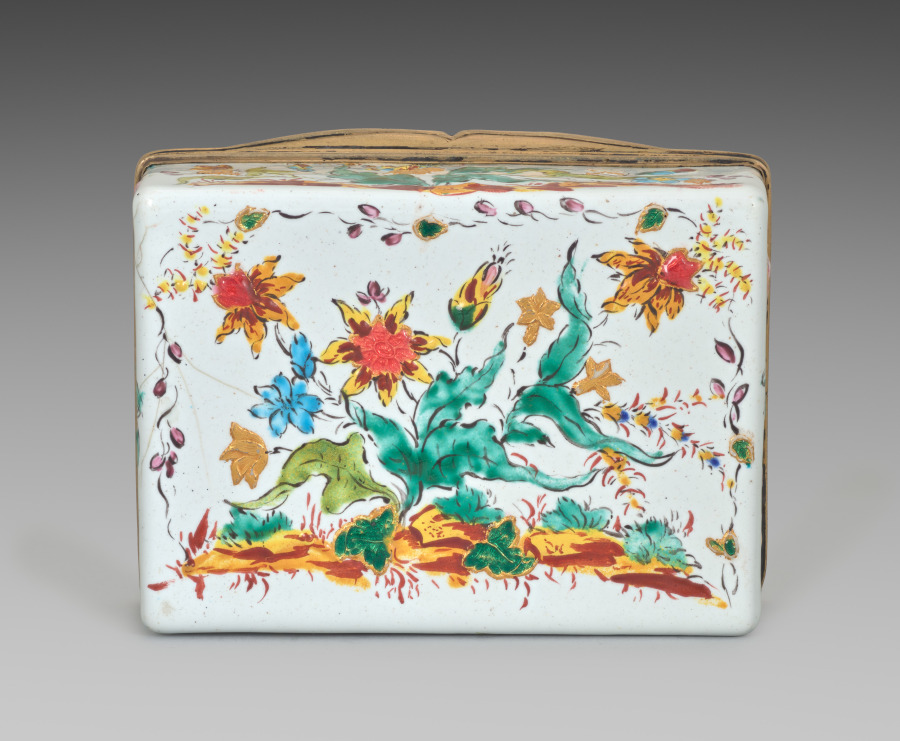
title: Box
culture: France, 18th century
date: 1749–50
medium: silver gilt and enamel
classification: Enamel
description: Chinoiserie in 18th-century France incorporated imitations of East Asian motifs, designs, and ornaments into European art. These imitations were often distorted by the European imagination and were not accurate representations of the cultures from which they drew inspiration. Elements of chinoiserie in this box can be seen primarily on the lid where enormous, vibrantly colored flowers tower over two crouching figures and a grouping of buildings.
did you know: The flower petals on the box lid are raised, an effect produced by drops of transparent enamel placed on the box’s surface that imitates polished gemstones or pearls.